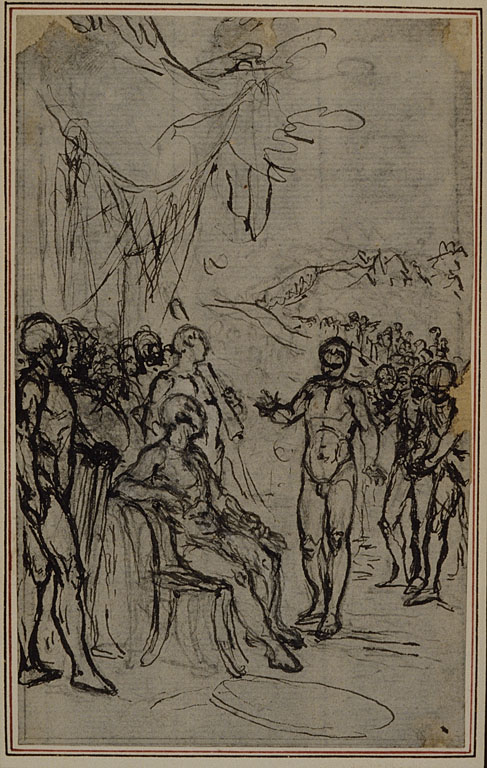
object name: Drawing and Watercolor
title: Study for Lucain's "La Pharsale", Canto IV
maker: Hubert François Gravelot (French, 1699-1773)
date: c. 1766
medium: Pen and black ink, over graphite, on gray laid paper, incised for transfer, and perimeter mounted on ivory laid paper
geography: France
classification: pen and ink drawings; drawings (visual works); prints and drawing